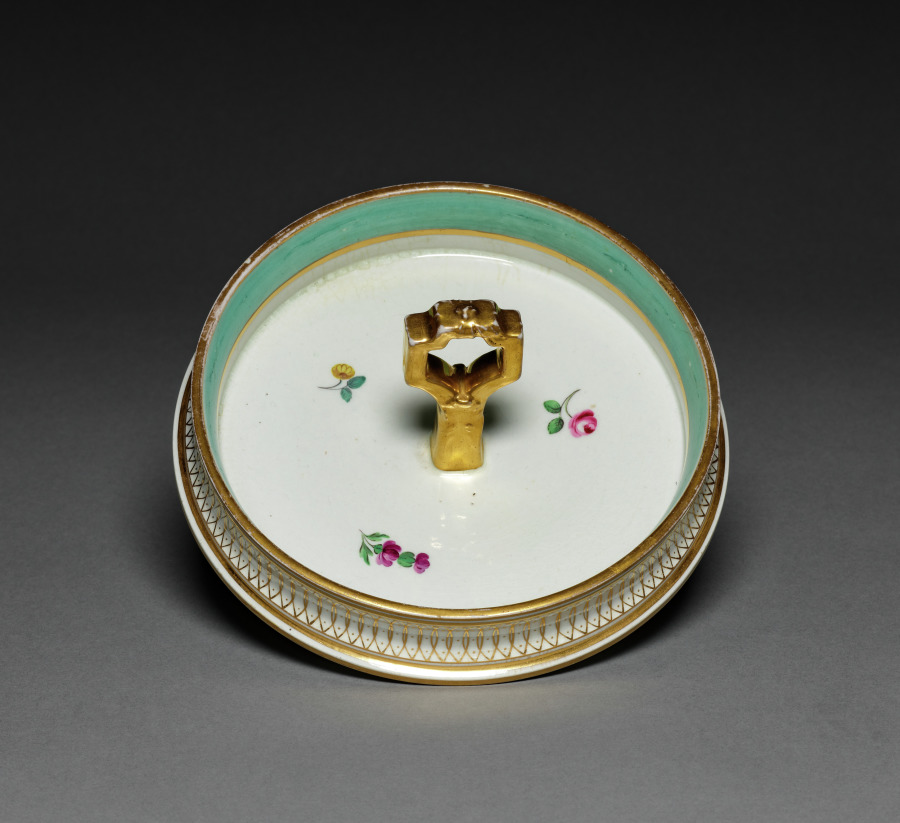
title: Cover for an Ice Pail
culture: England, Derby, 18th-19th century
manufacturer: Derby (Crown Derby Period) (British)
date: c. 1795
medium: porcelain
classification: Ceramic